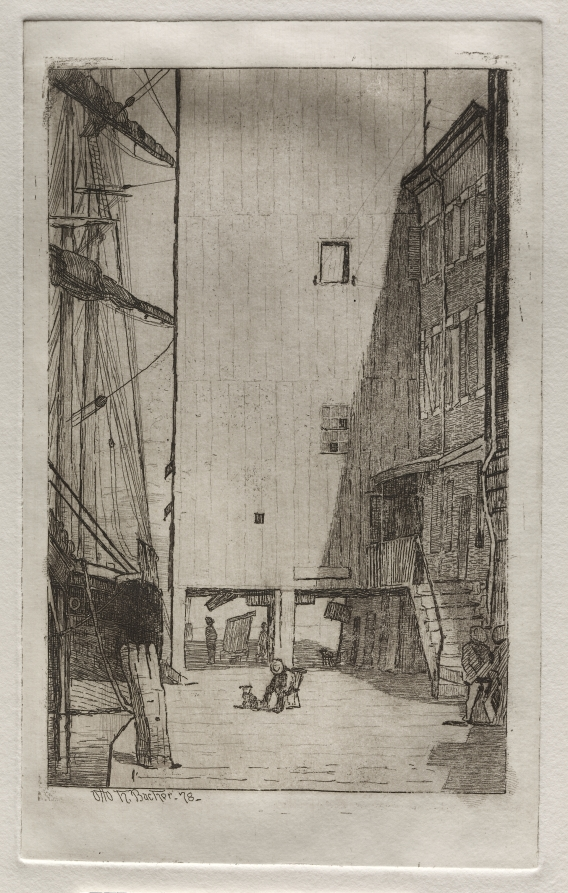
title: Ship and Elevator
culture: America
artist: Otto H. Bacher (American, 1856–1909)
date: 1878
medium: etching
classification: Print